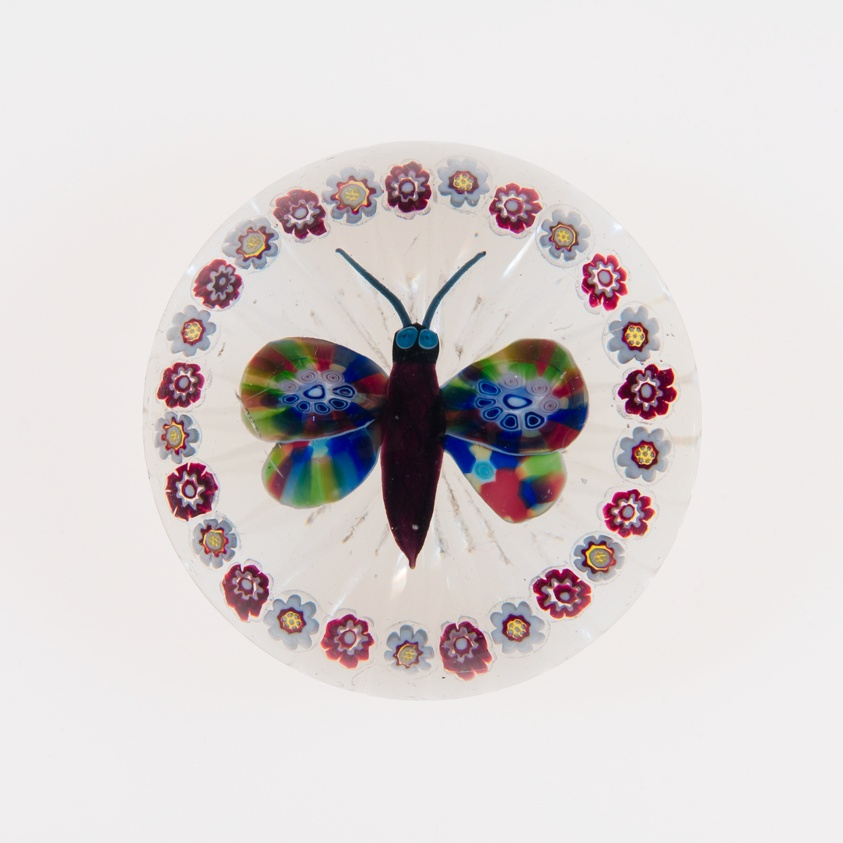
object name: Glass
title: Paperweight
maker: Baccarat Glassworks (Cristalleries de Baccarat); Lorraine, France, founded 1764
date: c. 1846–55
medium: Glass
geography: Lunéville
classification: paperweight; lampwork; european decorative arts; glass